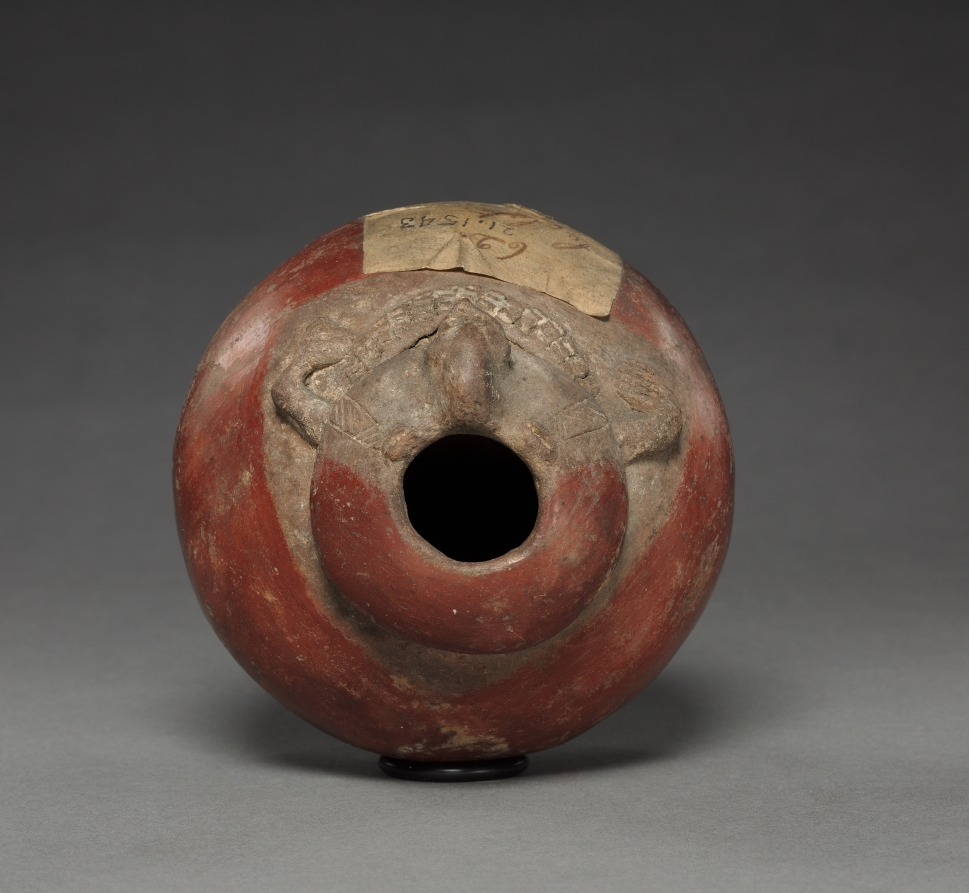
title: Dish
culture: Colombia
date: before 1550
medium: pottery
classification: Ceramic